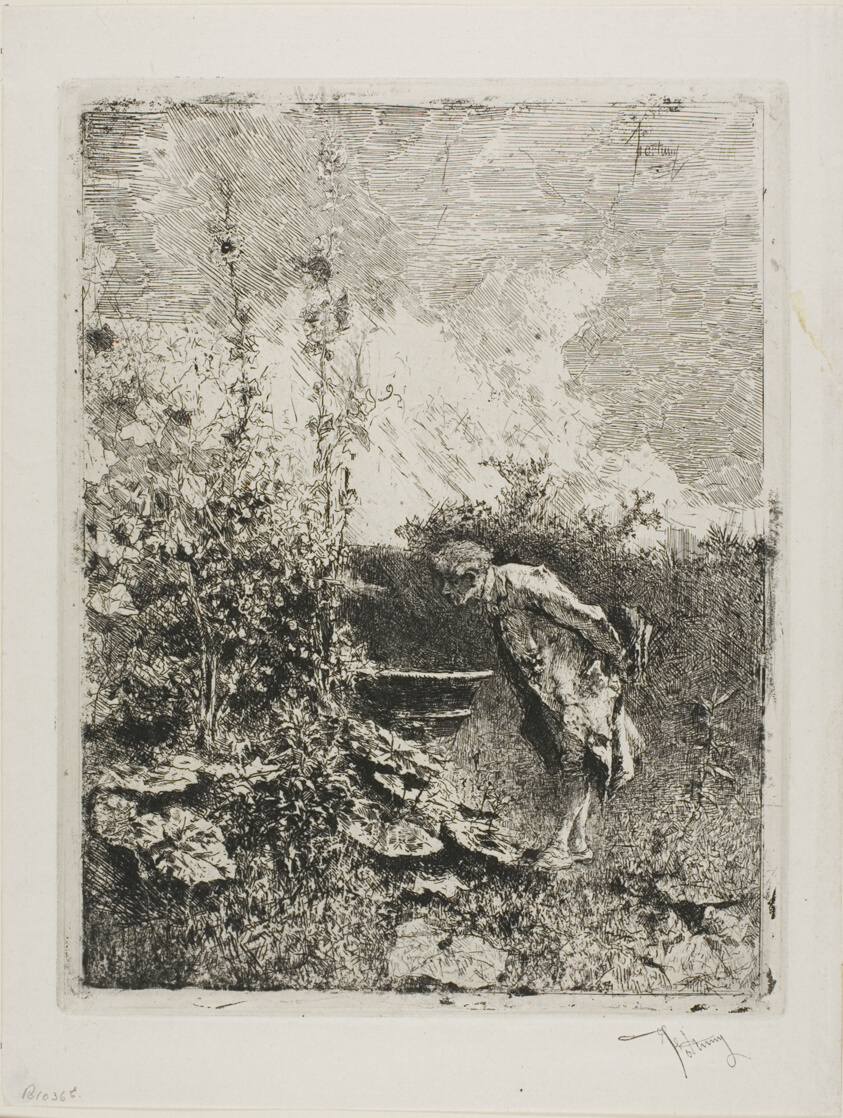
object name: Print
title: Amateur de Jardin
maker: Mariano José María Bernardo Fortuny y Carbó; Spanish, 1838-1874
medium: Etching on paper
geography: Spain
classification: etching; print; prints and drawing